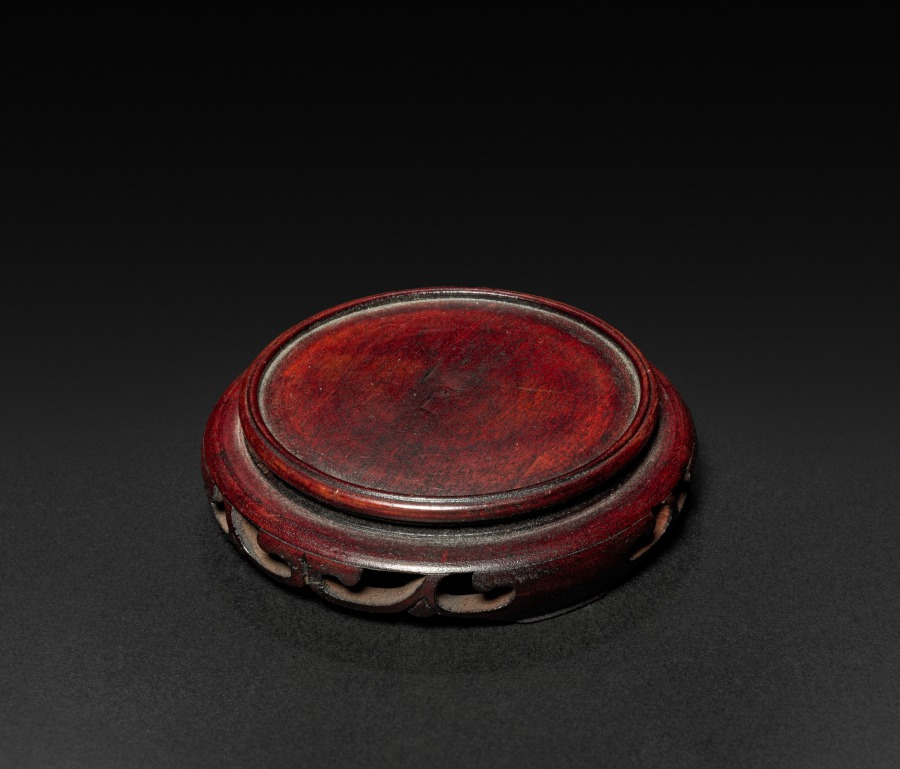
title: Ginger Jar (base)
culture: Japan, Meiji period (1868–1912) to Taishō period (1912–26)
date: early 1900s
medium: wood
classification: Wood